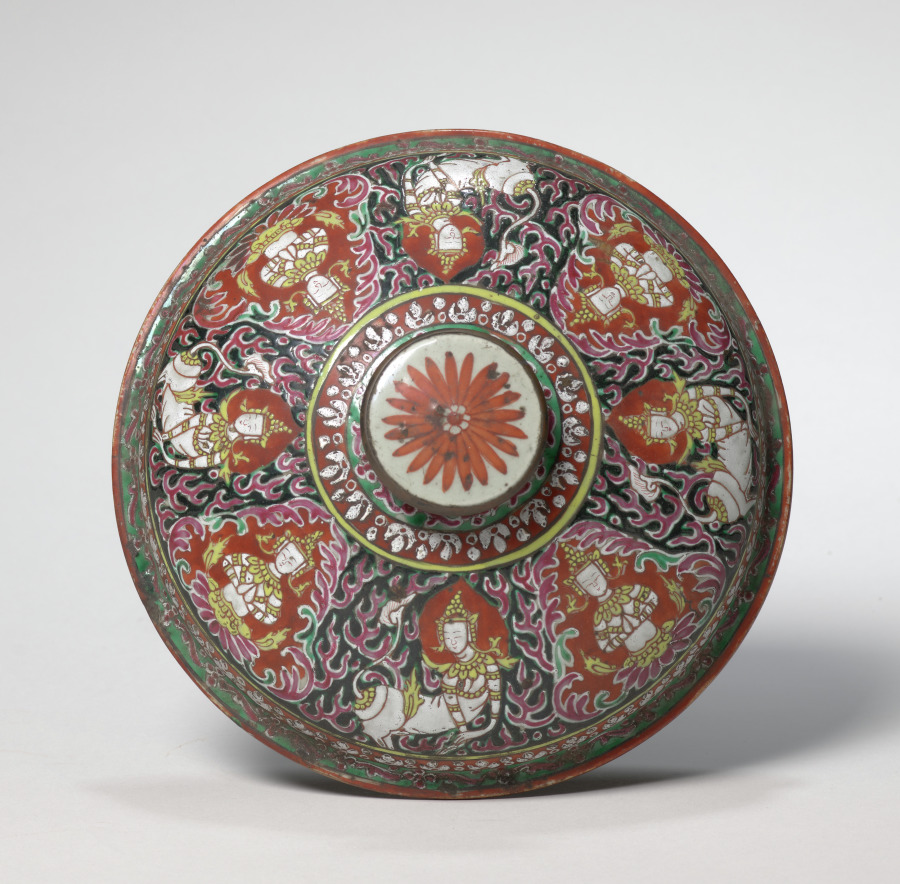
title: Jar (lid)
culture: Siam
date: 1800s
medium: porcelain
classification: Ceramic